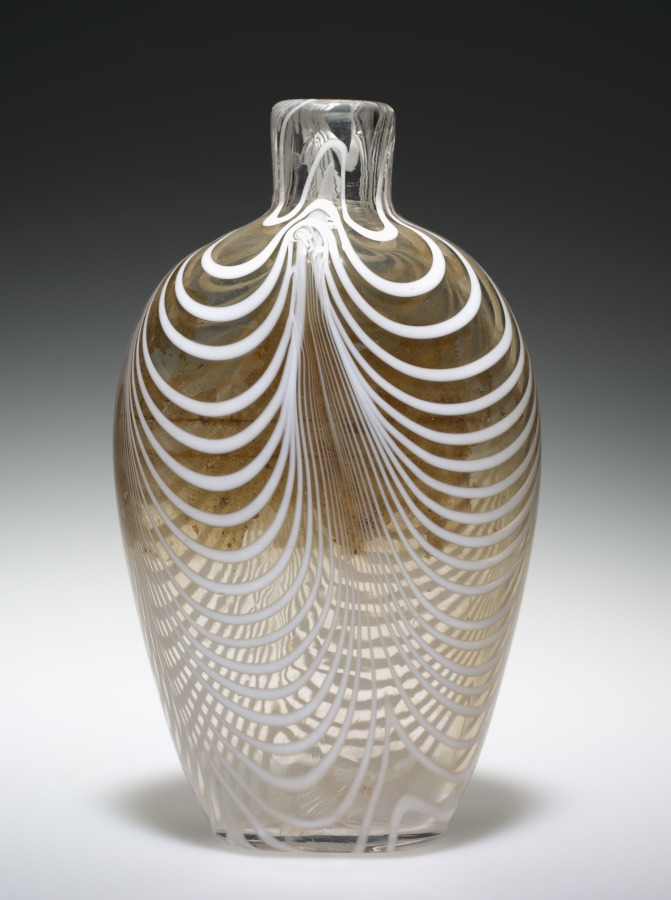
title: Flask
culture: America, South Jersey Type, 19th century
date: c. 1835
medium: glass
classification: Glass